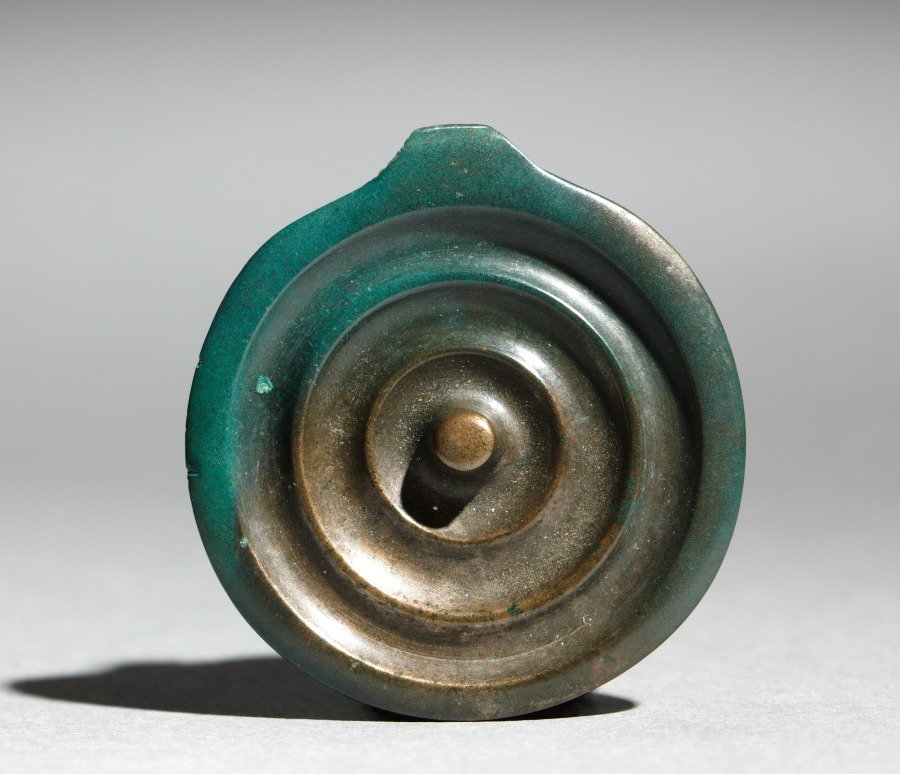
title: Elements from a Necklace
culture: possibly Hungary, Bronze Age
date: 1300s BCE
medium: bronze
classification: Jewelry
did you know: The cast bronze necklace pendants are partially oxidized, revealing a green patina.